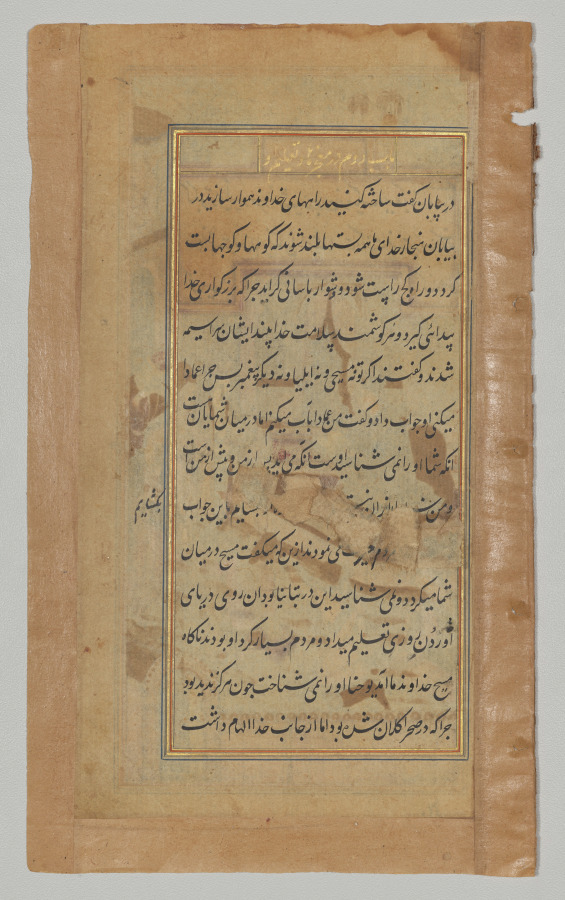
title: Text page from a Mirror of Holiness (Mir’at al-quds) of Father Jerome Xavier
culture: Mughal India, Allahabad, made for Prince Salim (1569–1627)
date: 1602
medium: Ink and gold on paper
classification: Manuscript